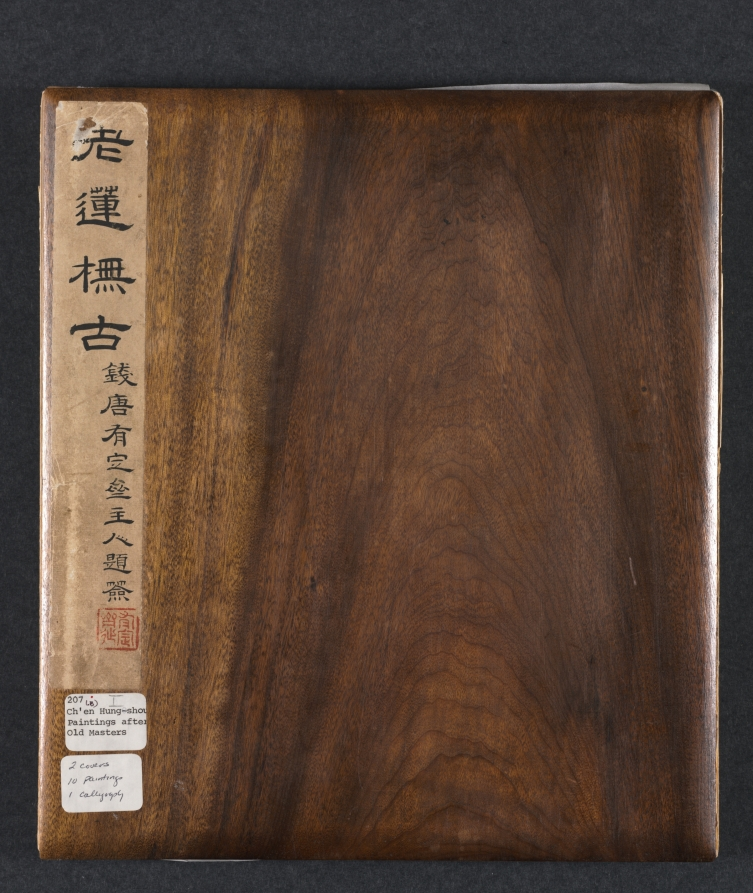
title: Paintings after Ancient Masters: Volume 1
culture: China, Ming dynasty (1368–1644)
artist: Chen Hongshou (Chinese, 1598/99–1652)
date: 1598–1652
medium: Album with eleven leaves; ink or ink and color on silk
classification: Painting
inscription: Artist's titles, signatures, and 21 seals: A. Scholars in a Garden. Hongshou painted for old Chung. [seal] Chang-hou. B. Laozi Riding an Ox. Hongshou respectfully painted. [seal] Ch'en yin Hongshou. C. Narcissus and Bare Trees. The Taoist Chung-ch'ing entrusted Lao-lien to paint [this]. [seal] Chang-hou. D. Autumn Landscape. Lao-lien painted this for Lao-ts'ang. [seal] Chang-hou. E. Portrait of Tao Yuanming. Lao-lien [seal] Hongshou. F. Lotus and Rocks. Hung-shou painted after the style of Ts'ui Po and presented it to the Buddhist disciple Lin Chung-ch'ing. [seal] Chang-hou. G. Daoist and Crane in Autumn Landscape. The old man Fu-ch'ih painted for the Daoist Chung-ch'ing. [seal] Chang-hou. H. Portrait of Chung-ch'ing in a Landscape. Lao-lien painted for Chung-ch'ing. [2 seals] Chang-hou; Ch'en yin Hung-shou. I. Chrysanthemum and Rock. Hongshou [seal] Hongshou. J. Landscape in the Style of Ni Zan. Lao-lien [seal] Chang-hou. L. Mr. Five Willows (Wu-liu), Tao Yuanming. Mr. Five Willows Chung-ch'ing entrusted Hongshou to paint [this]. [seal] Chang-hou. M. A Lohan [after Kuan-hsui]. Buddhist disciple Chen Hongshou respectfully painted. [2 seals] Chun-t'i ti-tzu; Chang-hou. N. A Bird and Peach-Blossom Branch. Hui-lun-shang painted after Tao-chun [Emperor Huizong] and presented it to Ts'ang-fu chu-chih. [seal] Chen yin Hongshou. O. Travellers in an Autumn Landscape. Hongshou [seal] Chang-hou. P. A Lady. Hongshou [seal] Hongshou . Q. Chrysanthemum. Hongshou painted in imitation of the Northern Song style for Daoist friend, Ts'ang-fu. [seal] Chang-hou. R. Scholar Reading in a Thatched Hut by a Waterfall. Chung-ch'ing entrusted Hongshou to paint. [seal] Chang-hou. S. Scholar with Staff and Brush. Hongshou [seal] Chang-hou. T. An Ancient Tree. Hongshou [seal] Chang-hou. U. Rock, Old Tree, and Bamboo. Hongshou [seal] Hongshou.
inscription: 2 colophons (leaves K and V) and 34 additional seals: 24 seals of Lin Chung-ch'ing (Lin Ts'ang-fu or Lin T'ing-tung, friend of Chen Hongshou, for whom the album was painted); 2 colophons, dated 1893 and 1899, and 5 seals of Weng Tonghe 翁同龢 (1830-1904); 2 seals of Weng Tongjue 翁同爵 (older brother of Weng Tonghe; 1814-1877); 2 seals of Weng Wan-go 翁萬戈 (1918-2020); 1 unidentified.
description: The twenty paintings in this double album by Chen Hongshou include landscapes, figures, and flowers. It also has one leaf featuring a woman, an often-used subject not found in the other albums from the latter part of his career. His late works are wonderful summations of Chen's peculiar and quirky art—archaistic, hyper-refined—but without accompanying shallowness or sentimentality. His figures and landscapes in the late albums are miniaturized, not unlike the small Chinese gardens, or the carefully selected small table rocks or old roots used for contemplation to see the world in miniature. This loss of scale is quite deliberate and reflects the psychological situation of a depressed class like the Ming loyalist officials and scholars, deprived of their integrity and honor, and forced to lead a diminished and restricted existence.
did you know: This album was owned by Weng Tonghe, who was tutor to the Tongzhi Emperor (r. 1862–75) and the Guangxu Emperor (r. 1875–1908).